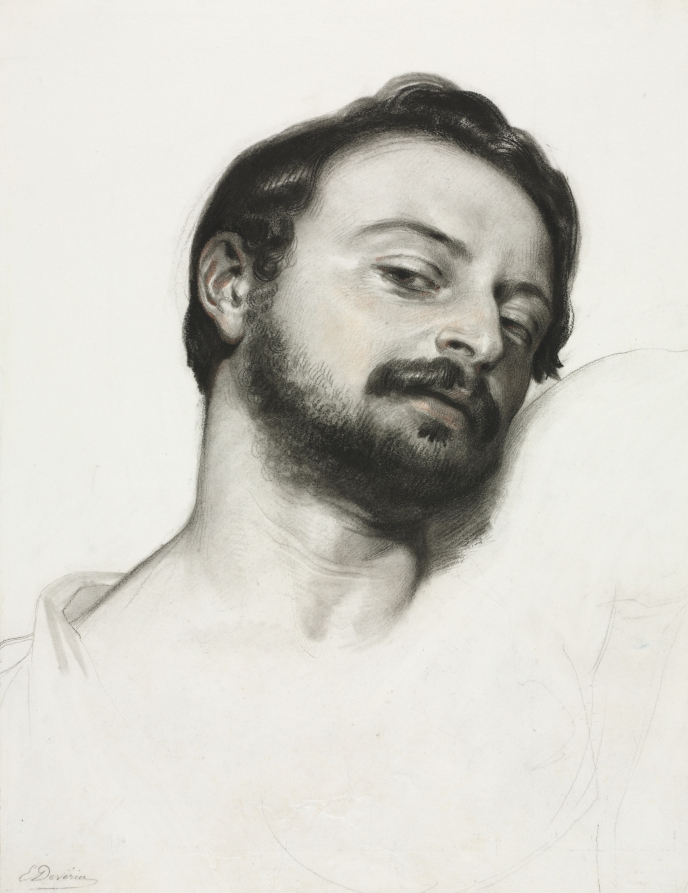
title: Head of a Man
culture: France, 19th century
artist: Eugène François Marie Joseph Devéria (French, 1805–1865)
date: c. 1824–65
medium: charcoal heightened with sanguine on white cardboard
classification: Drawing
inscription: Signed in black, lower left, E. Devéria